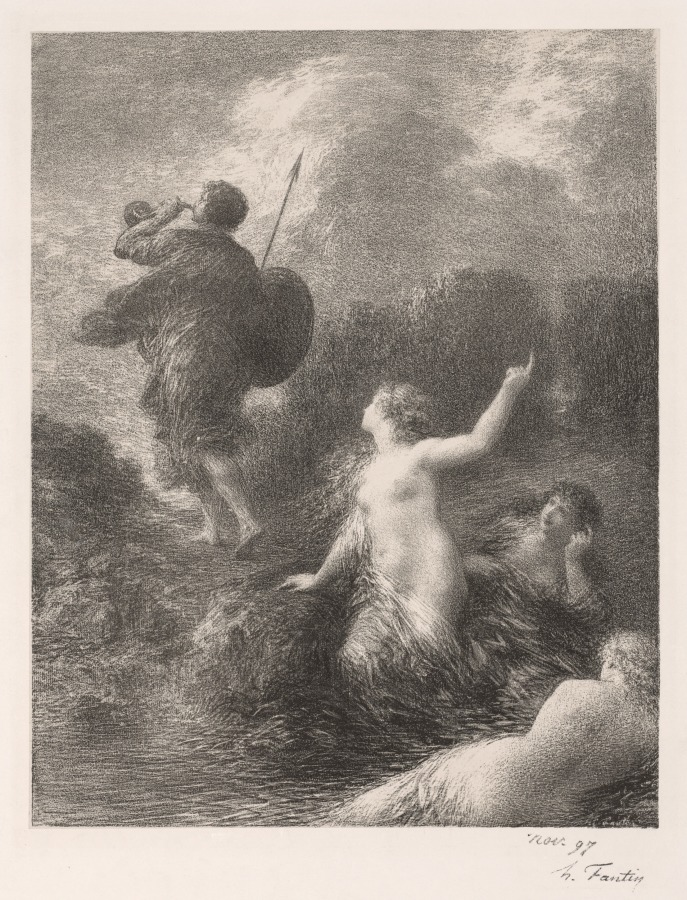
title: Goetterdaemmerung: Siegfried et les filles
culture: France, 19th century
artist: Henri Fantin-Latour (French, 1836–1904)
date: 1897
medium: lithograph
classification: Print